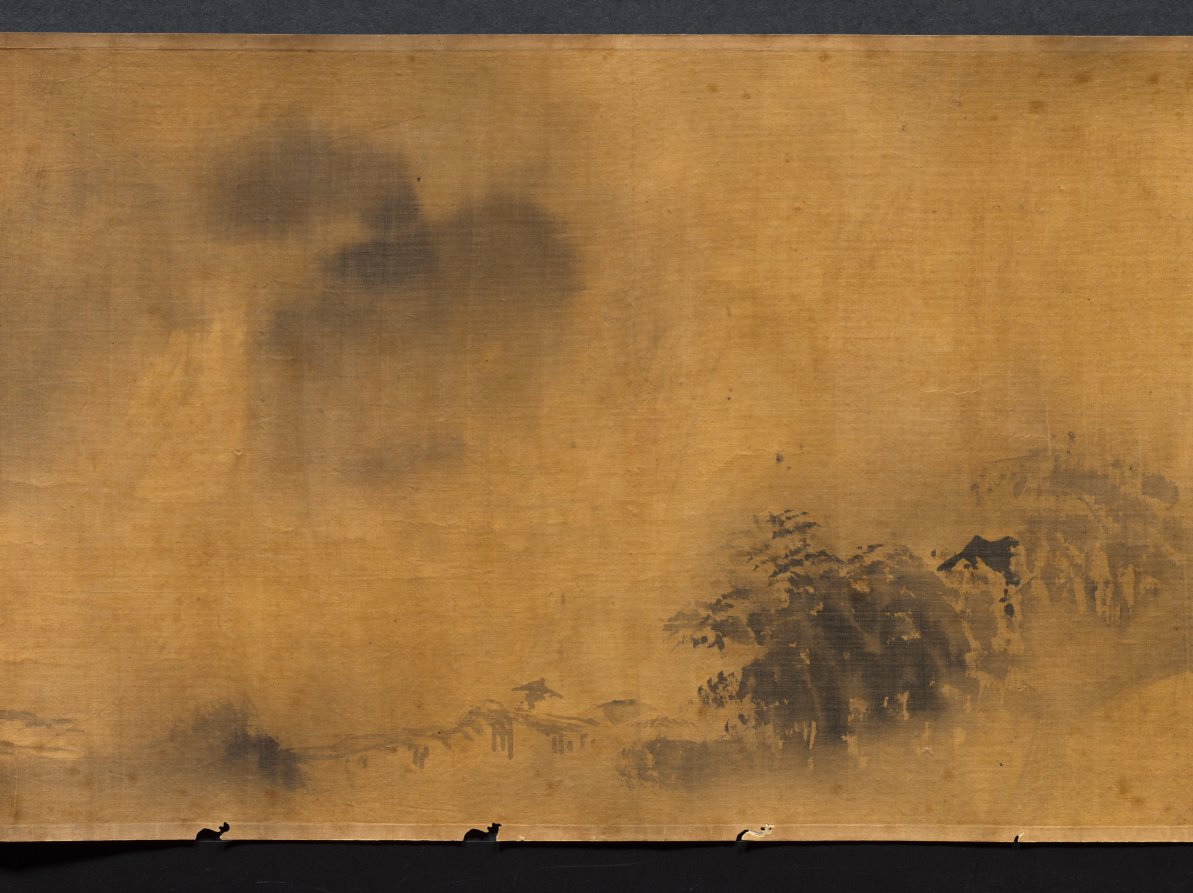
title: Eight Views of Xiao-Xiang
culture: Japan, Edo period (1615–1868)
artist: Kano Tan’yū (Japanese, 1602–1674)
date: 1615–1868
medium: handscroll; ink on silk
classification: Painting